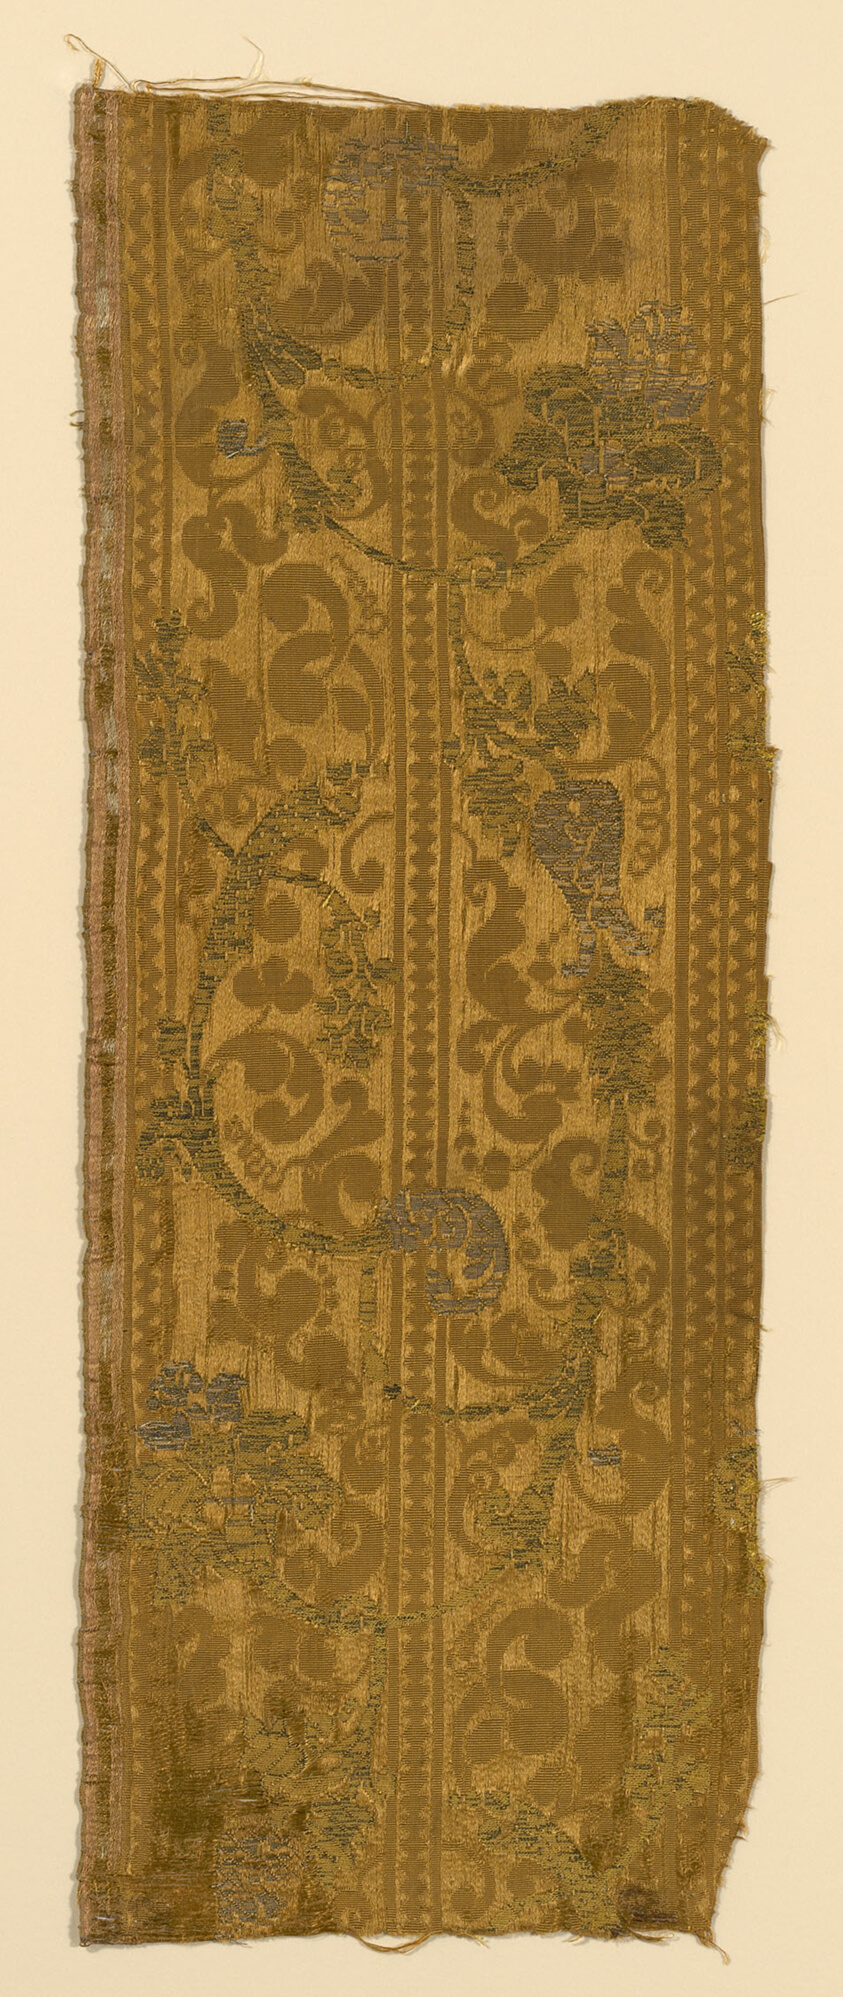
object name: Textile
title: Fragment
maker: Italy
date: Late 17th century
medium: Silk and silvered-metal-strip-wrapped silk, warp-float faced satin weave self-patterned by areas of plain weave with supplementary brocading wefts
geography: Italy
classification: textile; weaving